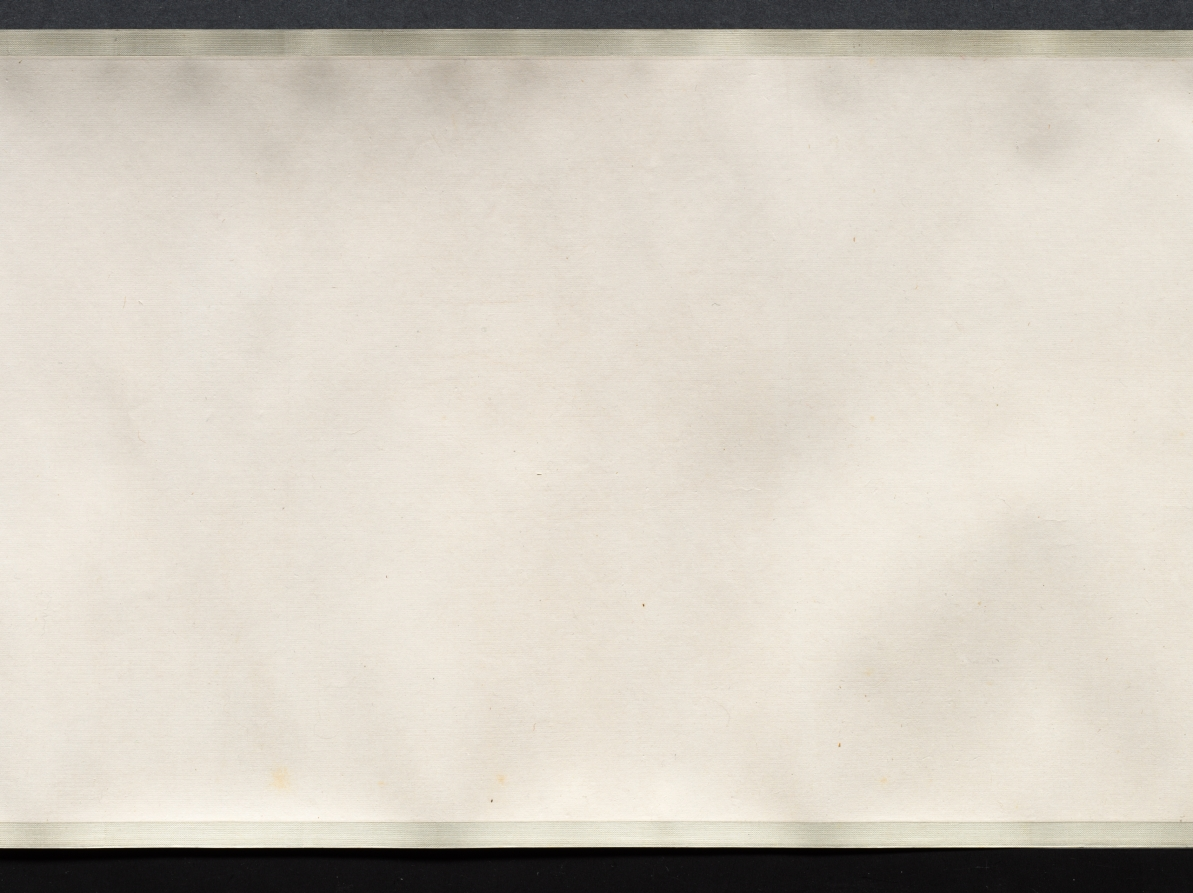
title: Autumn Mist in the Countryside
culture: China, Qing dynasty (1644-1911)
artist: Zou Zhe (Chinese, c. 1610-before 1688)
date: 1647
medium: handscroll, ink and color on paper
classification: Painting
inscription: Artist's inscription, signature, and seal: The first day of the sixth lunar month, the ting-hai year [1647], Tsou Che painted [this]. [seal] Fang-lu.